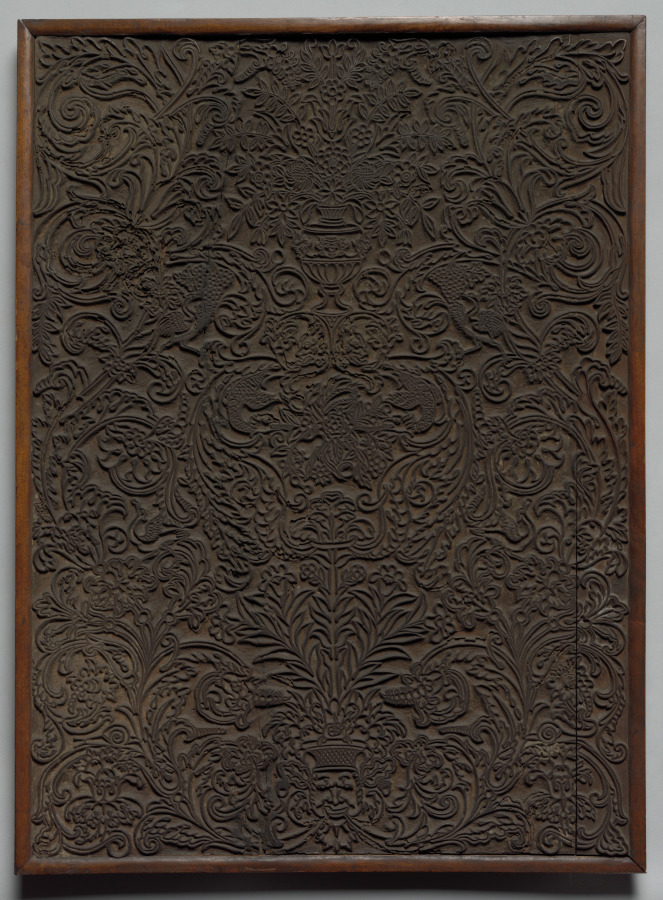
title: Panel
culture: Spain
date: 1600s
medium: wood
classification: Furniture and woodwork